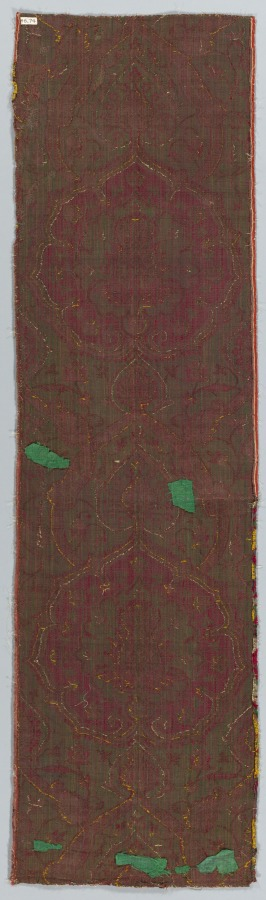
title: Brocaded Velvet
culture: Turkey, early 16th Century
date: c. 1500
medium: velvet: silk, brocaded with gold and silver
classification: Velvet